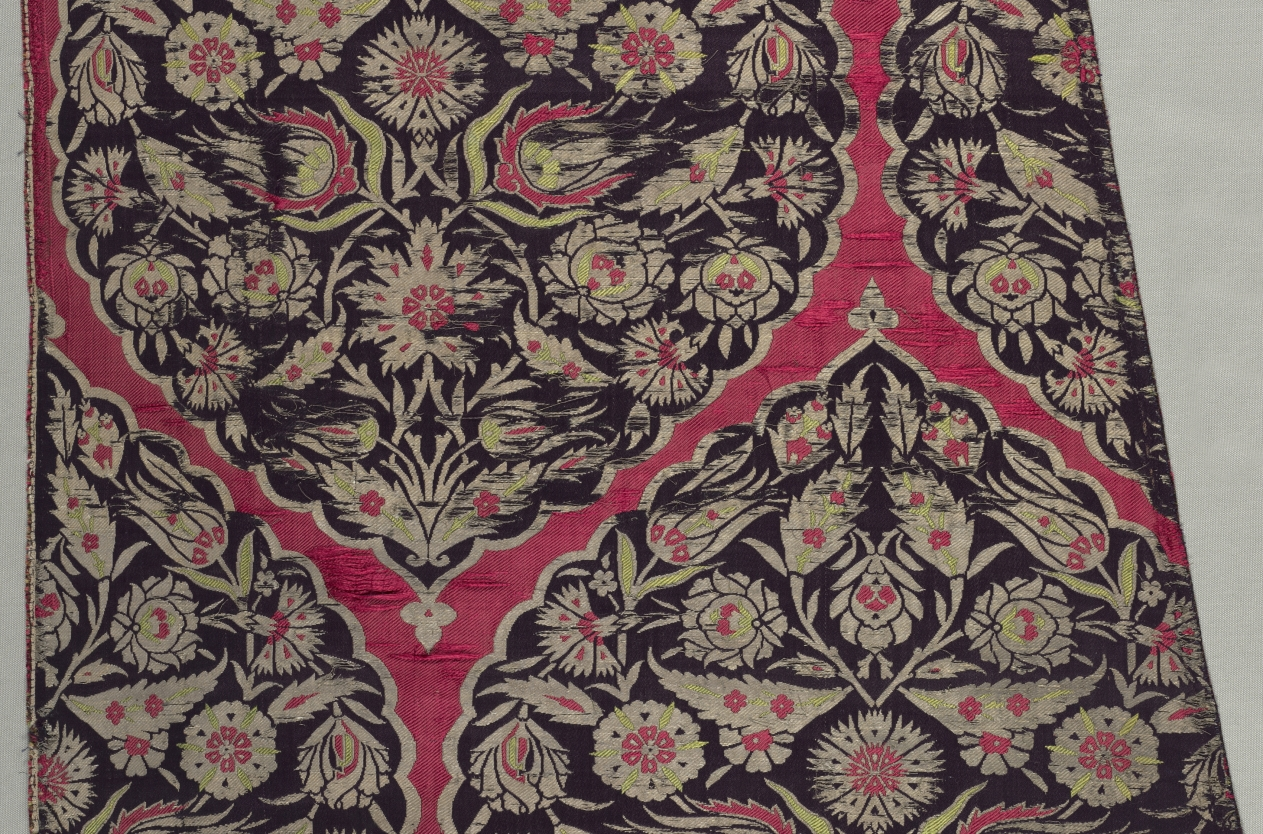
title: Brocaded silk with foliate medallions from a kaftan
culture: Turkey, Istanbul, Ottoman period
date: 1525–75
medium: Silk: lampas weave, silver-metal thread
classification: Textile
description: Medallions enriched with floral and foliate decoration were signature Ottoman patterns during the height of silk textile production in the second half of the 1500s. Imperial kaftans with related patterns are preserved in the Topkapi Palace Museum in Istanbul along with those worn by young princes. In this splendid length from a kaftan, abundant silver-thread flora and overlapping leaves on vines enliven medallions in the densely woven fabric. It is a combination of two weaves, called lampas, which creates two contrasting surfaces composed of vertical warps and horizontal wefts.